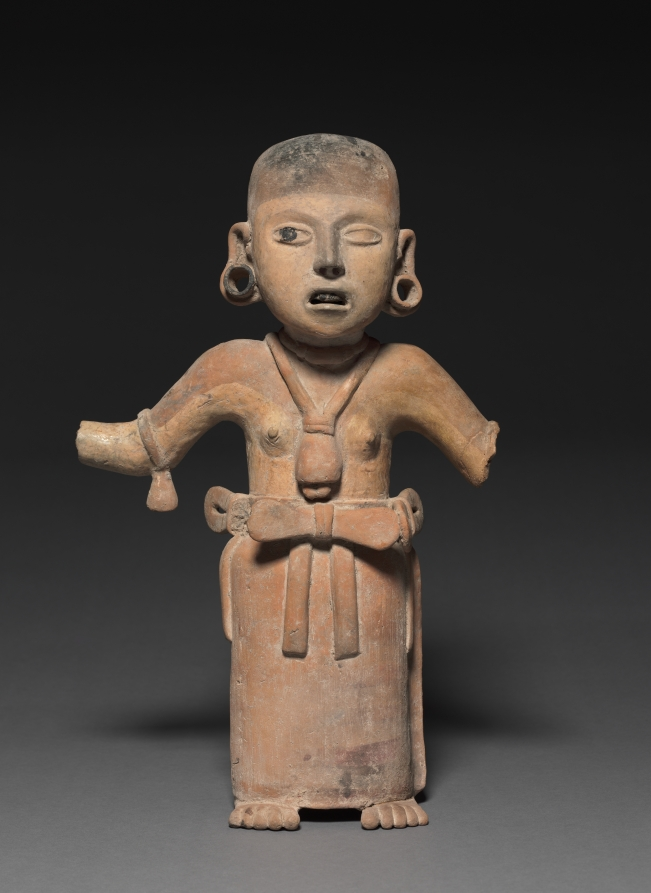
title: Female Figure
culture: Mexico, Southern Veracruz, Limon, Remojades Monumental Sculpture type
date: 200–500 CE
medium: pottery with burnished buff slip and asphalt paint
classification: Sculpture